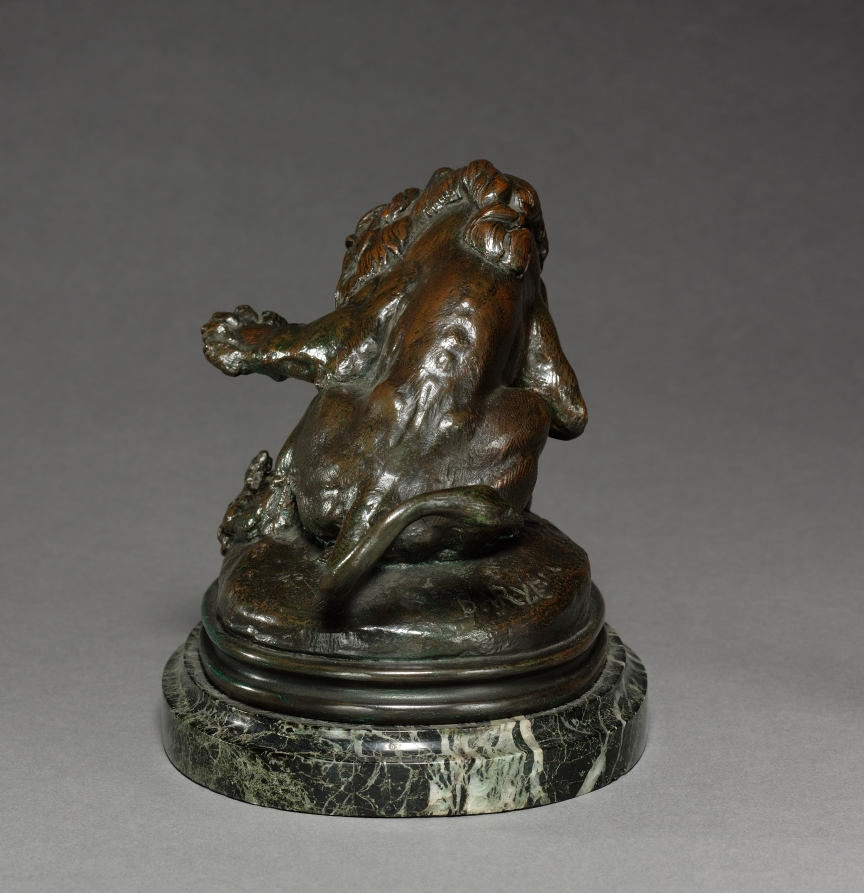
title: Lion and Serpent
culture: France, 19th century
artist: Antoine-Louis Barye (French, 1796–1875)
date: c. 1830 – 1875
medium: bronze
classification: Sculpture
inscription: Signed: "Barye"